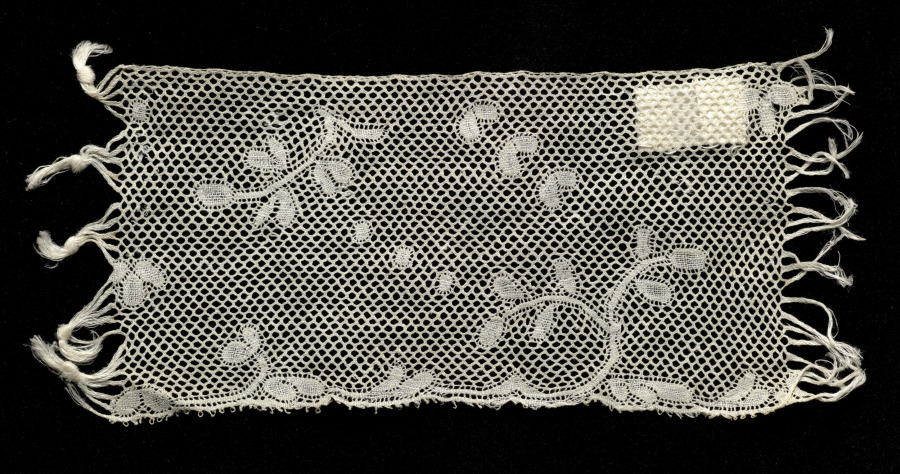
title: Lace Edging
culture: France, Valenciennes or Flanders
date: 1700s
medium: Linen: bobbin lace (Valenciennes)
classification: Lace